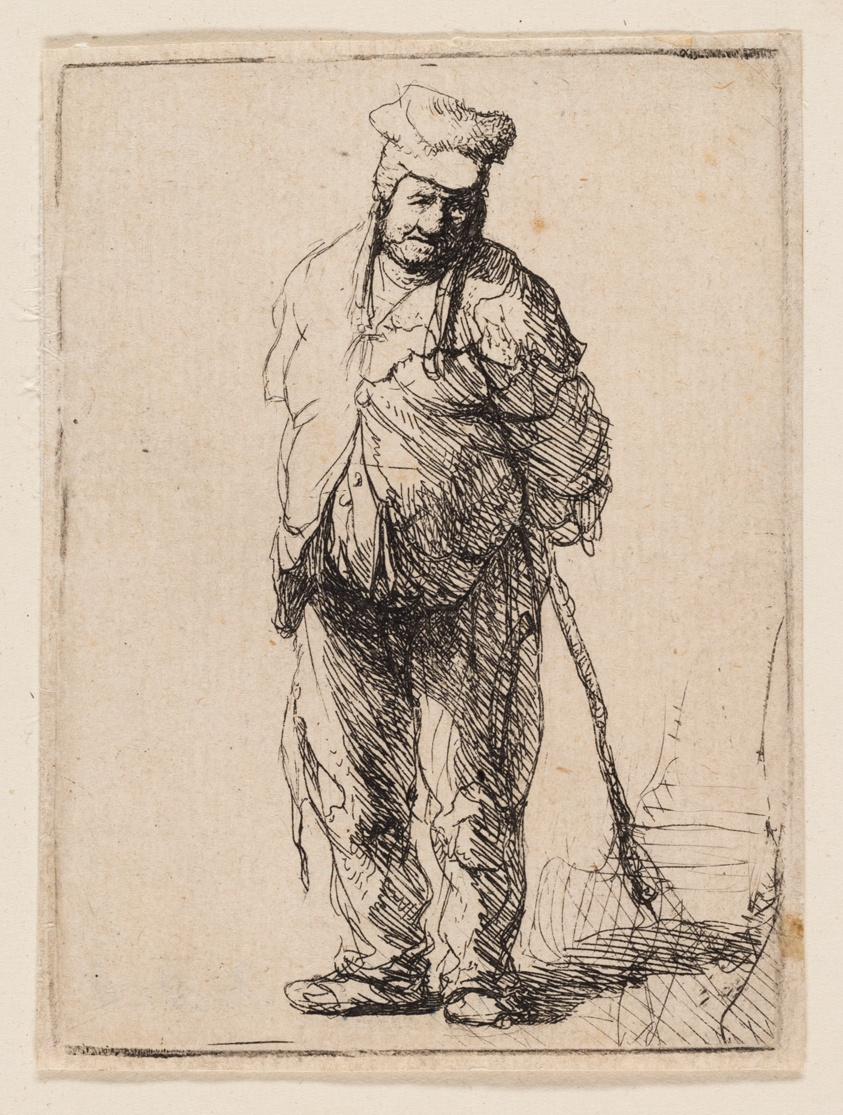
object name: Print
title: Ragged Peasant with His Hands behind Him, Holding a Stick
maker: Rembrandt van Rijn (Dutch, 1606-1669)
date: c. 1630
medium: Etching on ivory laid paper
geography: Holland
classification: etching; print; prints and drawing; paper